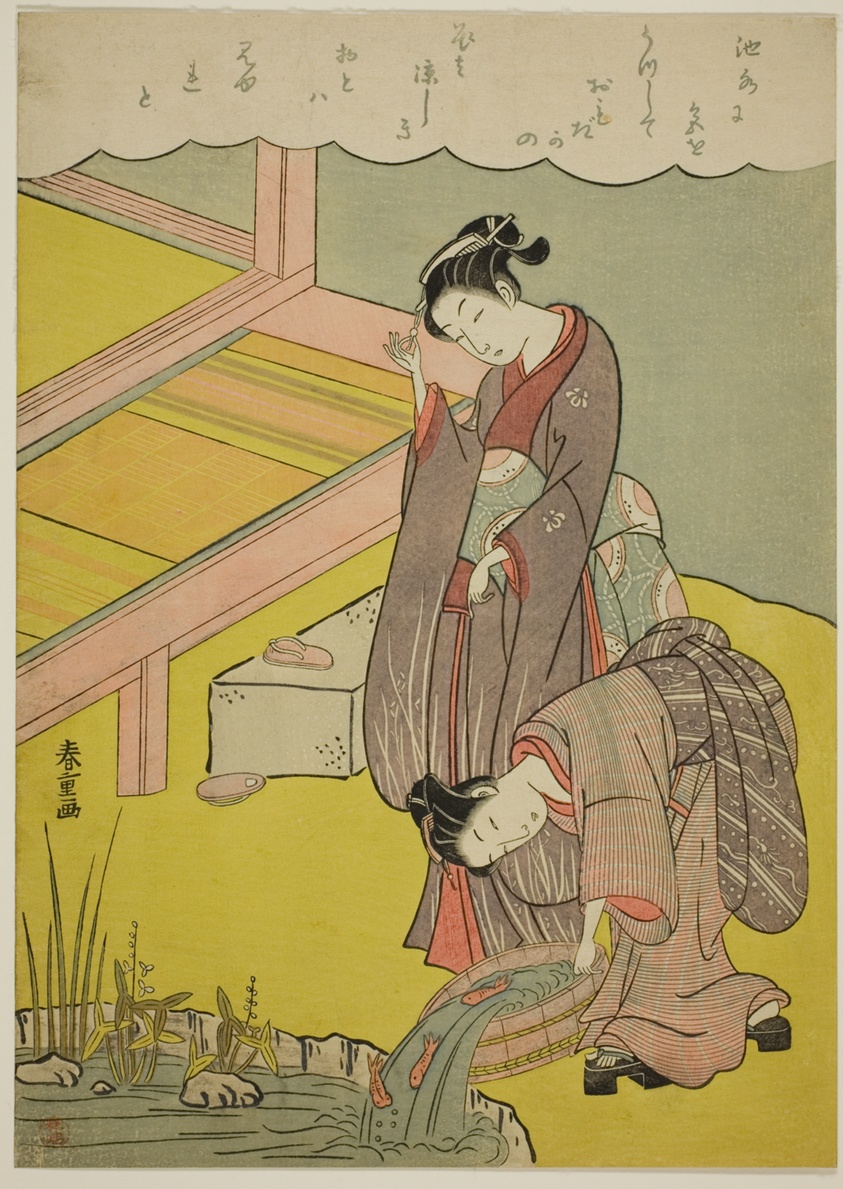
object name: Print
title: Young Girl Throwing Fish into Pond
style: Japanese (culture or style)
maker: Shiba Kokan (Suzuki Harushige); Japanese, 1747–1818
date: c. 1771/72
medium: Color woodblock print; chuban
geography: Japan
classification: woodblock print; print; asian art